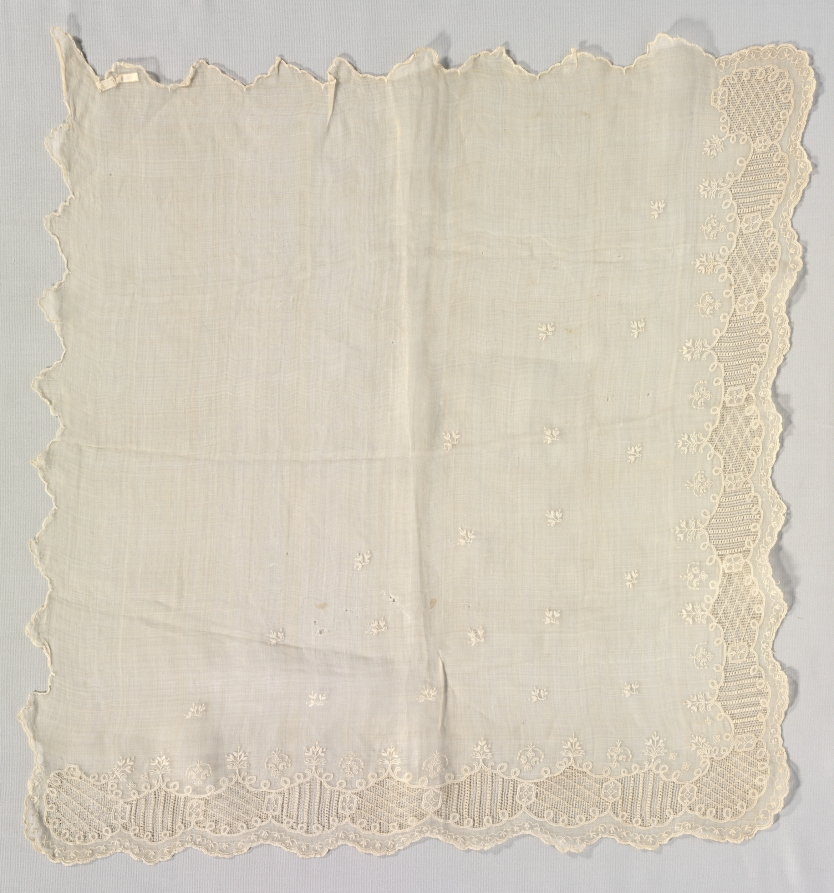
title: Lace Fichu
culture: Philippines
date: c. 1875–1900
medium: Plain weave piña: needle lace (drawnwork) and embroidery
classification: Embroidery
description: This square textile is made of fine piña fiber in plain weave. It has a wide hand-embroidered cotton border on all sides, featuring scalloped edges and repeating floral and geometric motifs. Small embroidered floral elements are scattered across the interior field. This object was probably worn as a fichu or neck covering.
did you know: A fichu is a large, square kerchief worn by women to fill in the low neckline of a bodice.